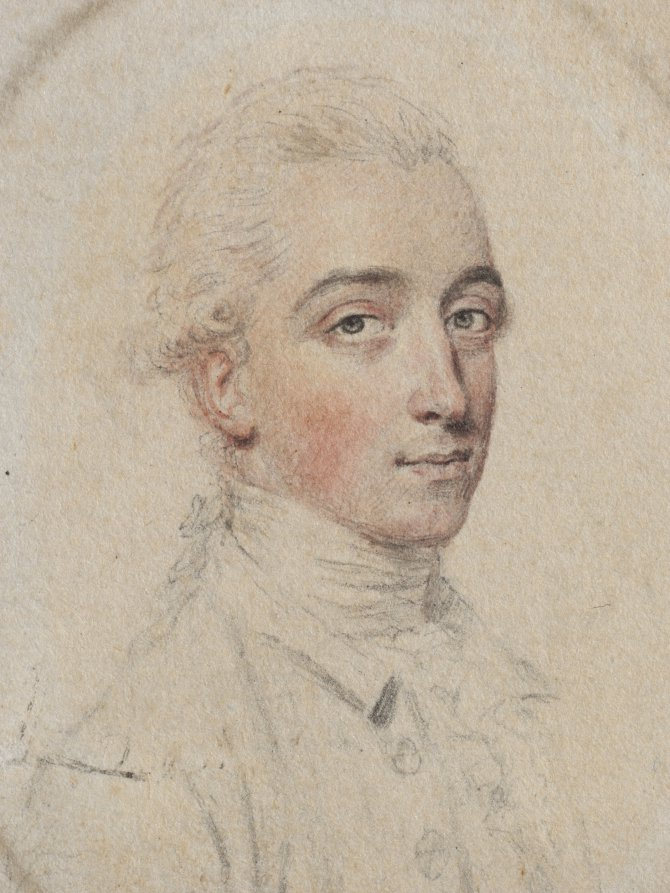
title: Portrait of Mr. Gambier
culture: England, 18th century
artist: John I Smart (British, 1741–1811)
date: c. 1776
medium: graphite and wash on laid paper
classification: Portrait Miniature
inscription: Signature: none; inscribed in graphite on front of paper at upper right corner: [?][?]2; inscribed on paper backing: in graphite, upside down at upper left: 15; in graphite, on a slant at left center to upper right: Mr. Fitzherbert; inscribed on back of paper in graphite: Mr. [Gambier]; inscribed in brown ink: Gambier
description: Although it is impossible to say if it was always part of the artist’s process to execute a preparatory sketch prior to painting each miniature, we do know that John Smart retained many hundreds of these sketches. A group of preparatory sketches—of which this portrait is one—descended through the Smirke family after Smart’s daughter Sarah gave a sketchbook containing preparatory portrait studies to her friend Mary Smirke, sister of the celebrated Victorian architect Sydney Smirke. This book was probably broken up around 1877 when it was divided between Sydney’s daughters Mary Jemmett and Mrs. Lange, whose portions were both sold at auction in 1928. G. C. Williamson was the first to suggest that Smart’s sketches were well known and that they were preparatory studies for the painted miniatures. Williamson listed the names of sitters from the sketches known to him at the time, and they include Mr. Fitzherbert, the identification formerly given to the sitter in this portrait. Here, the sitter’s head and shoulders are facing left. He has brown eyes and wears his powdered hair en queue. His coat has a narrow collar, under which he wears a high stock collar and frilled vest. The color of his attire is not suggested, and the background remains unpainted. Though long catalogued as Mr. Fitzherbert, the portrait was likely mistakenly designated as such at a later date. There has been confusion regarding several miniatures called Mr. Fitzherbert, which may or may not be related. There was a sketch of a different Mr. Fitzherbert in the Jemmett sale of February 29, 1928; another in the Burton-Jones collection by the 1940s; and a miniature of a Mr. Fitzherbert portrayed nearly full face and dated 1771 was sold at Sotheby’s, London, on August 1, 1934 (lot 73). The present location of these unpublished miniatures is unknown, as is their credibility as portraits of the Mr. Fitzherbert that Smart is known to have painted. When the paper backing of the Cleveland miniature was removed in 1993, the name Gambier was discovered inscribed in graphite and pen on the back. This miniature relates to a portrait of a man on ivory dated 1774, formerly in the Ashcroft collection and at one time on loan to the Victoria and Albert Museum. It was sold at Sotheby’s, London, on May 7,1946 (lot 61) and catalogued as a “miniature of a young man, by John Smart, signed and dated, head and shoulders three-quarters sinister, gaze directed at spectator, fair hair en queue, in white cravat, frilled vest and rich red coat, 1 3/8 in.” The size of the portraits correspond, though the ivory miniature represents less of the figure than is seen in the sketch and is therefore smaller. While the color red for the coat is not indicated in the sketch, Smart often left the dress of his male sitters plain in preparatory sketches. Thus, this currently unlocated miniature on ivory can be identified as Mr. Gambier. Research into the identity of this gentleman is ongoing.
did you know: Sketches helped John Smart work out the particulars of a portrait before commencing the miniature on ivory; they were useful in the event that a duplicate might later be required.